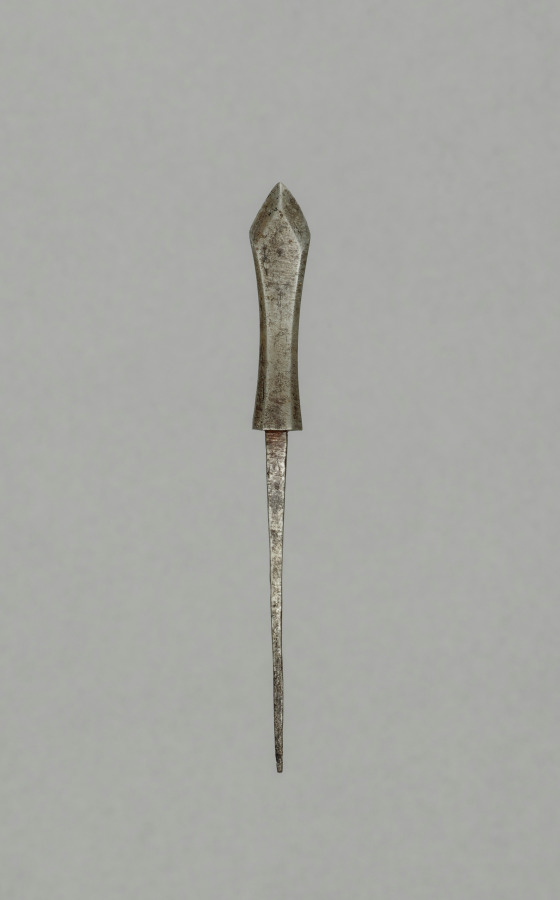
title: Arrow Point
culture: Japan, Edo period (1615–1868)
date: 1700s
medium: steel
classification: Arms and Armor